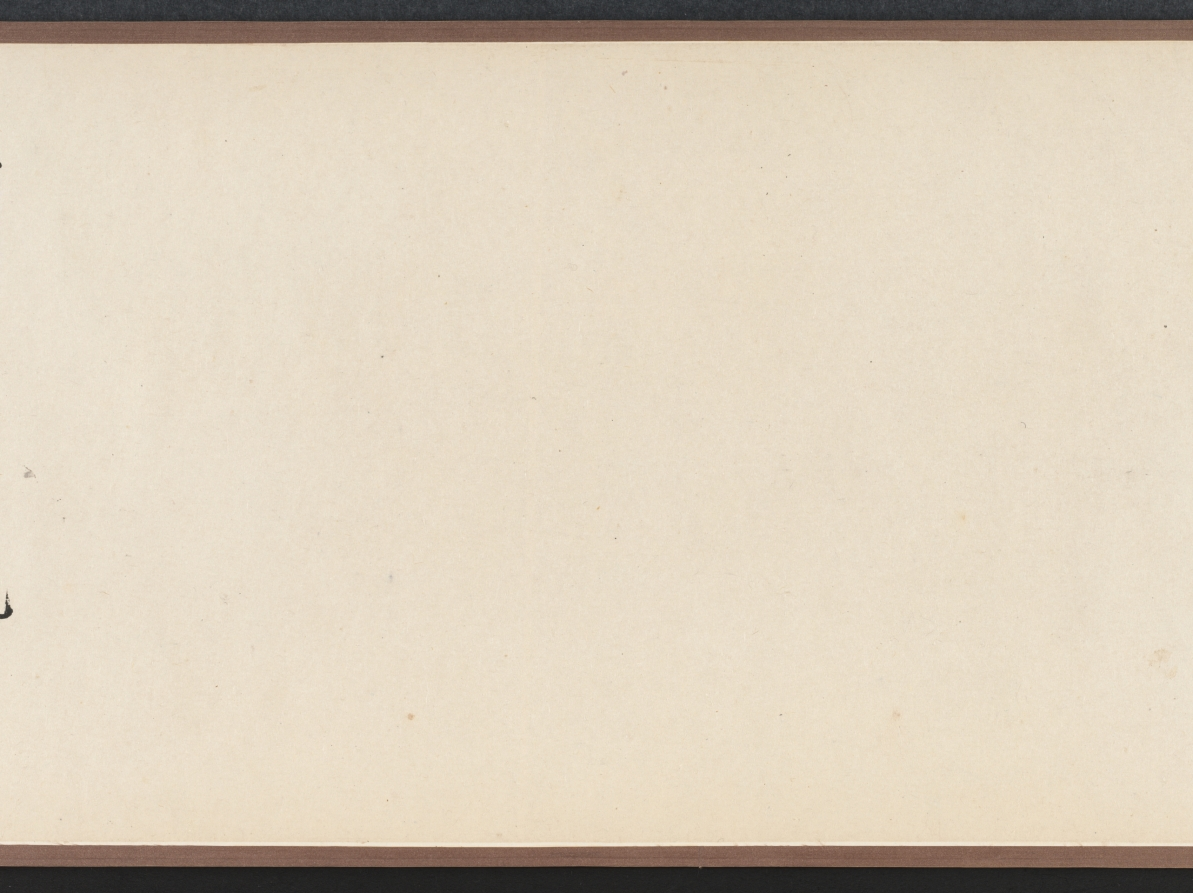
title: Waiting for the Moon in the Mid Autumn Festival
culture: China, Ming dynasty (1368–1644)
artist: Shi Rui (Chinese, c. 1400-c. 1470)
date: 1400s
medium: handscroll, ink, color, and gold on silk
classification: Painting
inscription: [印] 石氏以明; 游戯翰墨.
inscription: 僊山樓觀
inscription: 1 inscription, dated 1639, and 1 seal of Xiao Yuncong 蕭雲従 (1596-1673). Inscription by Xiao Yuncong: This is a painting by the Junior General Li. The painting is damaged and cracked at many places. Many of the paper strips for backing have been missing since long ago, but the colors are still fresh as if they had just been applied and the ink still looks moist. During the reign of Tianbao (742-756) of the Tang Dynasty, the Imperial Klansman Li Sixun was summoned to paint the walls of the Datong Hall. He was known as the "Senior General." His son, who came to be known as the "Junior General," was named Zhaodao. Of the stone epitaph [Li Sixun bei, or the "epitaph of Li Sixun," one of the best known calligraphic monuments of the Tang Dynasty], engraved with the calligraphy of Li Beihai 李北海 [Li Yong 李邕, 678-747], more than half has fallen off. Why, in contrast, was this painting able to survive? Or could it be that despite the fact that the stone is hard and the silk is soft, their preservation or destruction depends on some other factors? Moreover, since they were titled nobility of imperial descent, it is doubtful that they had the leisure and the mood to indulge in such decorative and descriptive blue and gold painting for the mere amusement of their fellow men. Recently, I read the Yi zhou ming hua lu 益州名畫錄 [by Huang Xiufu 黃休復, preface 1005]. I found a certain Li Chin-nu who compared himself with Li Zhaodao 李昭道 and was called by the Sichuan people the Junior General Li. In a painting which he did, entitled Mt. Ch'ing-ch'eng, the architectural structure of the pavilions, terraces, bridges, and boats are meticulous and accurate. The horsemen on a spring outing are as small as grain and the wild geese among the clouds as tiny as dust. It was also said that he painted on silk of any length in accordance to specific commissions. Is it possible that this painting is one of his? Since that time 700 years have passed. Yet one of the two Junior General Li's must be our painter. Formerly, there were the so-called "Four Excellents" in the Hall of Portraits of the Buddhist monk Wu-ta Kuo-shih: the [portrait] painting by Ch'ang Ts'an [act. ca. 881-888}, the calligraphy by Priest Tao-ying, the eulogy by Li Shangyin 李商隱 [813-858], and the landscape by Li Sheng [act. ca. 908-925]. This Li Sheng was styled Chin-nu and was also called Junior General Li. In the tenth month of the Chi-mao year, the twelfth year of the Chongzhen era [1639], recorded by Xiao Yuncong of Wuhu. trans. WKH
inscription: 4 colophons and 30 additional seals: 1 seal of Xu Qianxue 徐乾學 (1631-1694); 1 seal of Li Chien 黎簡 (1747-1799); 1 seal of Chang Chin-fang (18th c.); 2 seals of Sun Erzhun 孫爾準 (1770–1832); 1 colophon and 2 seals of Zhang Weiping 張維屛 (1780-1859); 1 seal of Wu Rongguang 吳榮光 (1773-1843); 1 colophon and 2 seals of Luo Tianchi 羅天池 (1826 jinshi); 7 seals of Wu Yanhui 伍元蕙 (active 1821–1851); 2 colophons and 4 seals of Pan Zhengwei 潘正煒 (1791-1850); 9 seals unidentified.